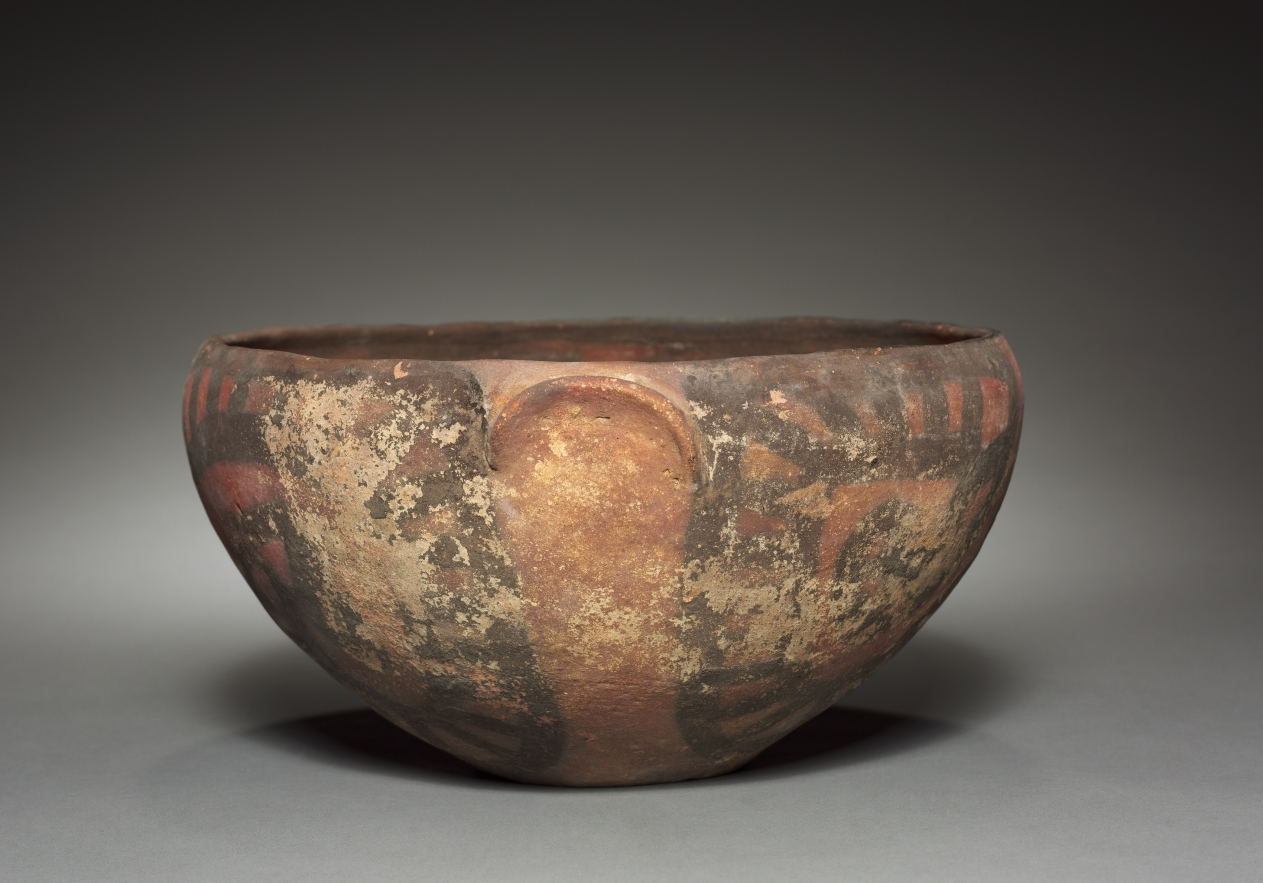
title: Two-Handled Bowl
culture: Argentina, Santamariana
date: 1000–1500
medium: earthenware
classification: Ceramic